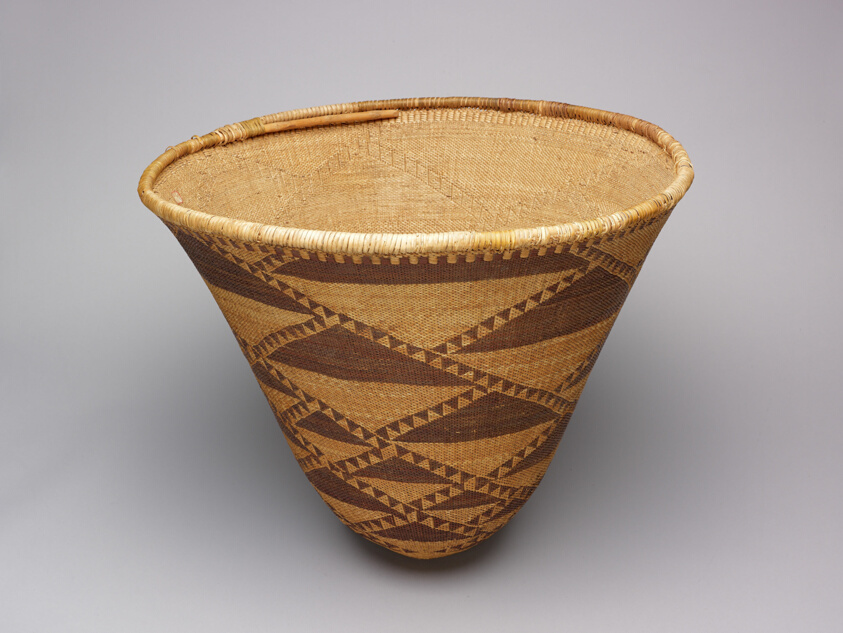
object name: Basketry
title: Burden Basket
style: pomo, native american, northern california, americas, Arts of the Americas, native north american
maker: Pomo (Northern California, United States)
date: 1870–80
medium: Plant fibers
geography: California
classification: basketry; vessel; fiber; wood; art of the americas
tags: basketry, baskets, diagonals, geometric